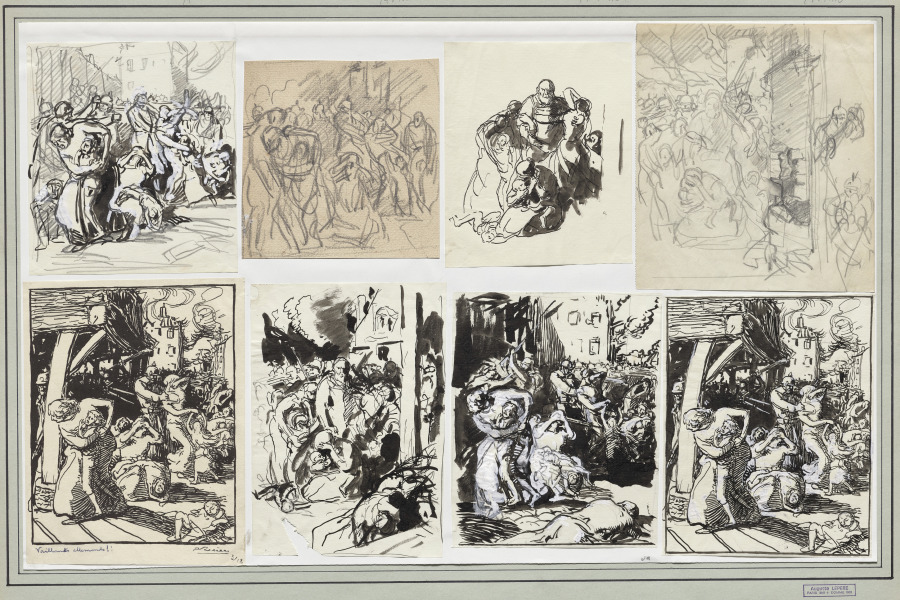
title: Vaillants Allemands!!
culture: France, 20th century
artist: Auguste Louis Lepère (French, 1849–1918)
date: 1914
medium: pencil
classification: Drawing